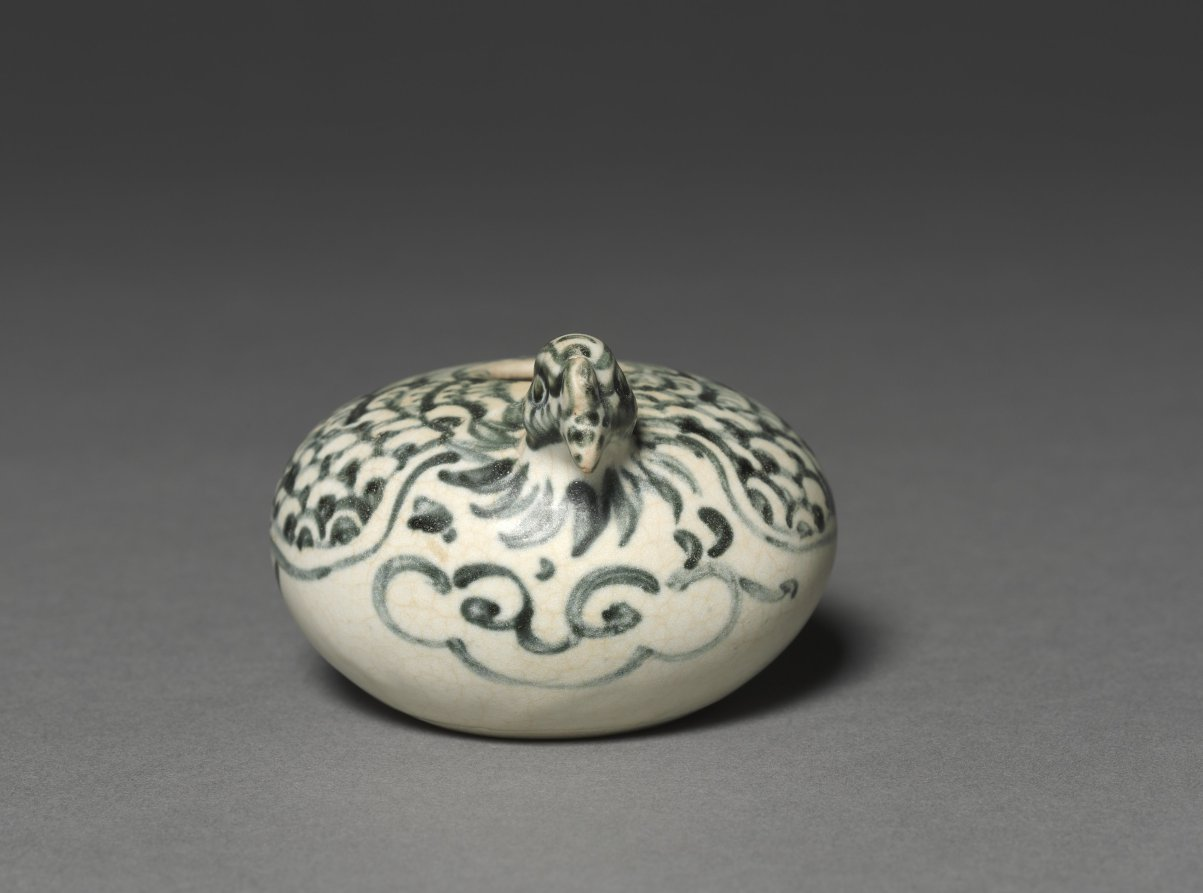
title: Bird-Shaped Jar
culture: Vietnam (Annam)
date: 1400s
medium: porcelain with underglaze blue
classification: Ceramic